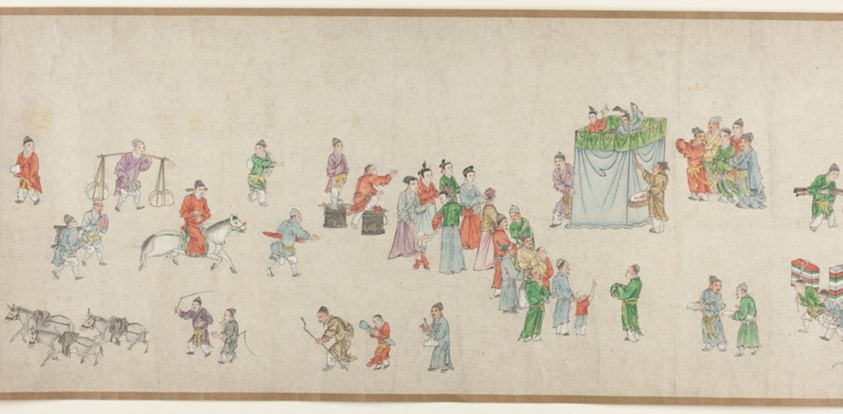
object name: Painting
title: Street Scenes in Times of Peace 太平風會圖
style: Chinese (culture or style)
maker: Zhu Yu (Zhu Junbi) 朱玉（朱君璧）; Chinese, 1293-1365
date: Yuan dynasty (1279–1368), 14th century 元朝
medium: Handscroll; ink and colors on paper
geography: China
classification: handscroll; painting; asian art